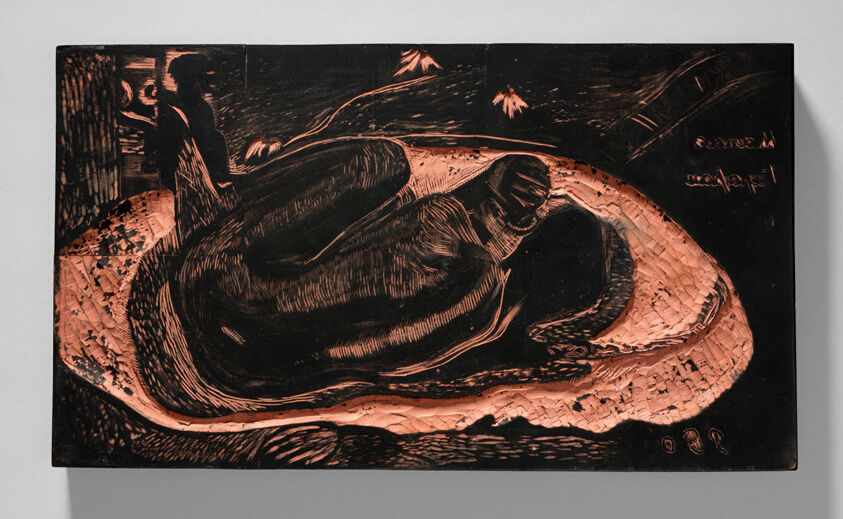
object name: Print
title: Manao tupapau (She Thinks of the Ghost or The Ghost Thinks of Her), from the Noa Noa Suite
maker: Paul Gauguin (French, 1848-1903)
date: 1893/94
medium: End-grain boxwood block, with a commercially prepared gray ground, sealed with an opaque pink oil medium, and inked in black ink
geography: France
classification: print; matrix; prints and drawing